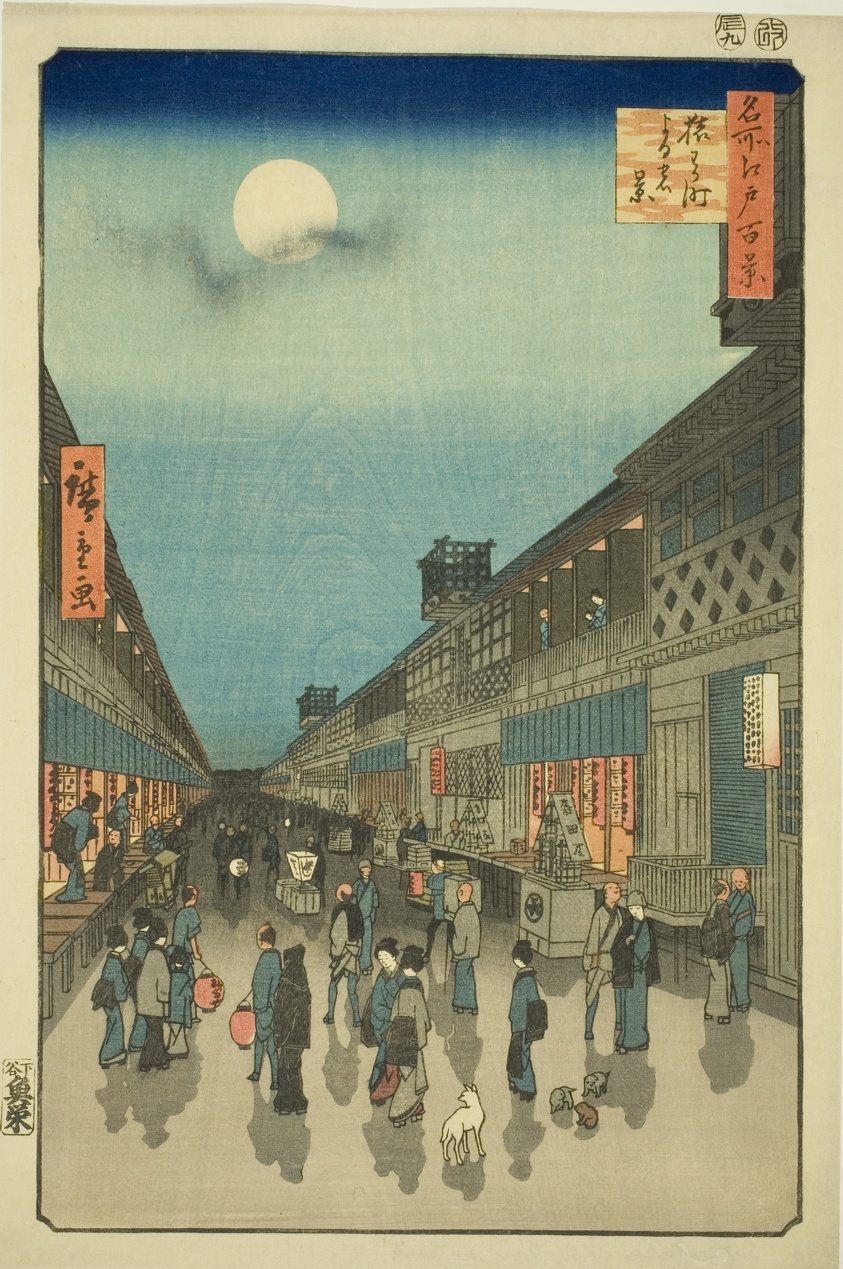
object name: Print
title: Night View of Saruwaka-machi (Saruwaka-machi yoru no kei), from the series "One Hundred Famous Views of Edo (Meisho Edo hyakkei)"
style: Japanese (culture or style)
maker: Utagawa Hiroshige 歌川 広重; Japanese, 1797-1858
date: 1856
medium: Color woodblock print; oban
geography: Japan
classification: woodblock print; print; asian art